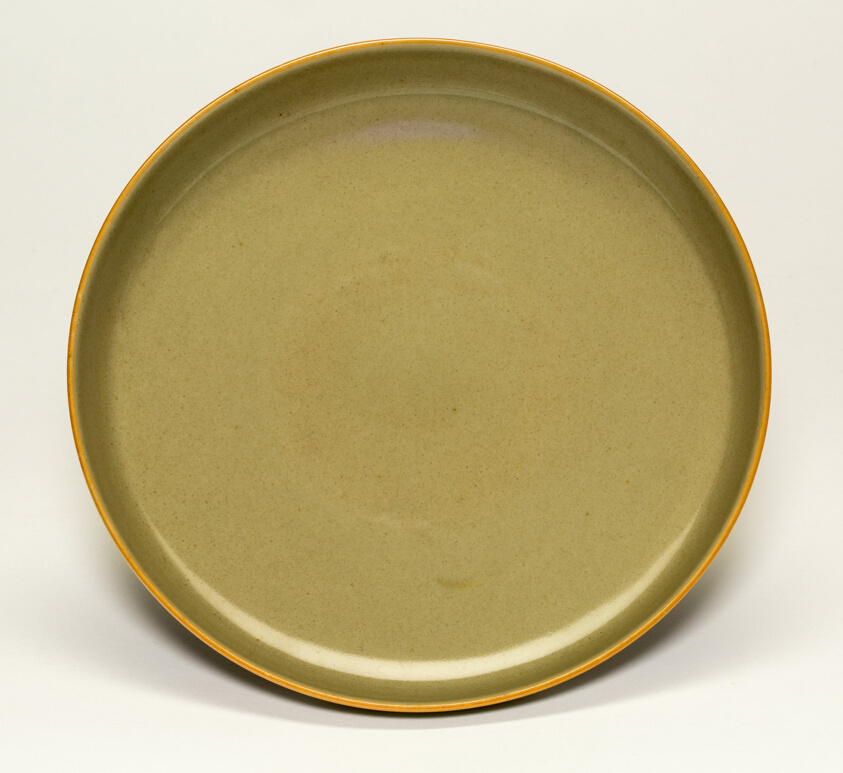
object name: Decorative Arts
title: Yaozhou style glazed dish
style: Chinese (culture or style)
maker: China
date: Qing dynasty (1644–1911), Yongzheng reign mark and period (1723–1735)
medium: Porcelain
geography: China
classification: dish (vessel); porcelain; asian art; ceramics; decorative arts